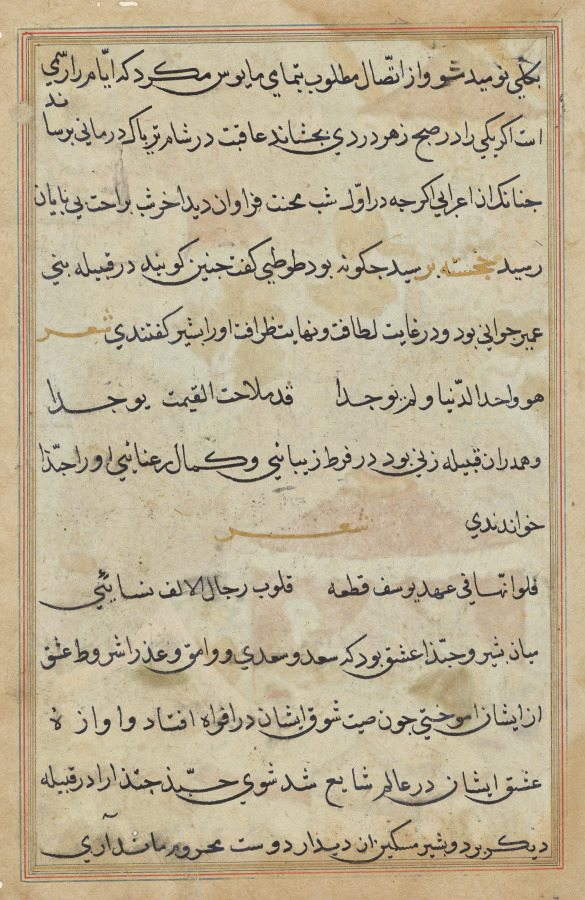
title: Page from Tales of a Parrot (Tuti-nama): text page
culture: Mughal India, court of Akbar (reigned 1556–1605)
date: c. 1560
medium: gum tempera, ink, and gold on paper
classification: Painting